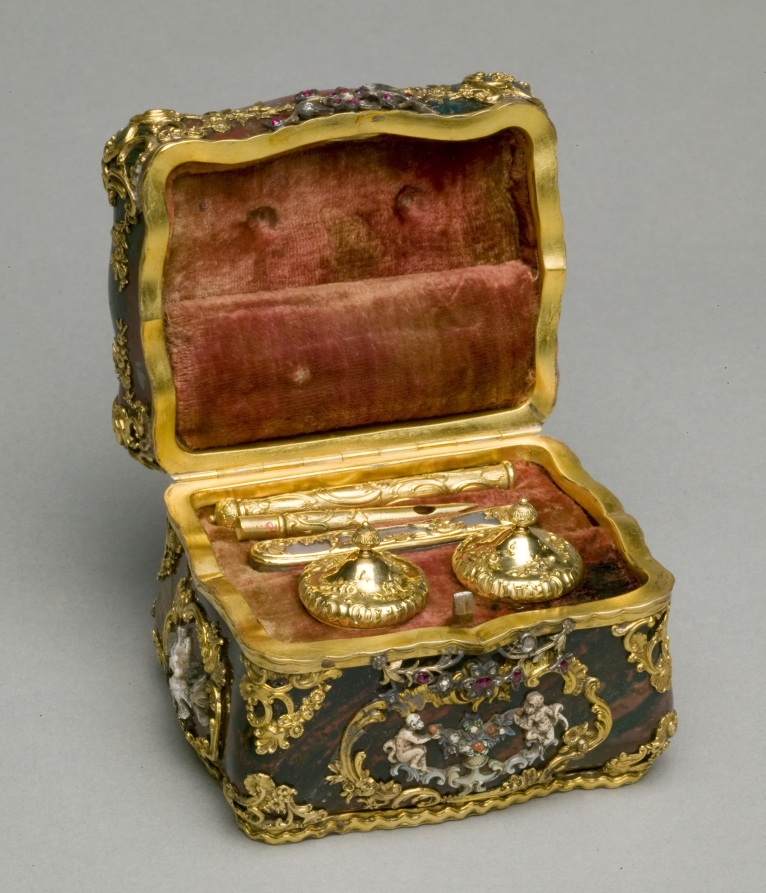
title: Inkstand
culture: Continental, 19th century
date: 1800s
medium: fused red and green glass (?) mounted with gold, pearl, jewels; interior lined with velvet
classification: Miscellaneous